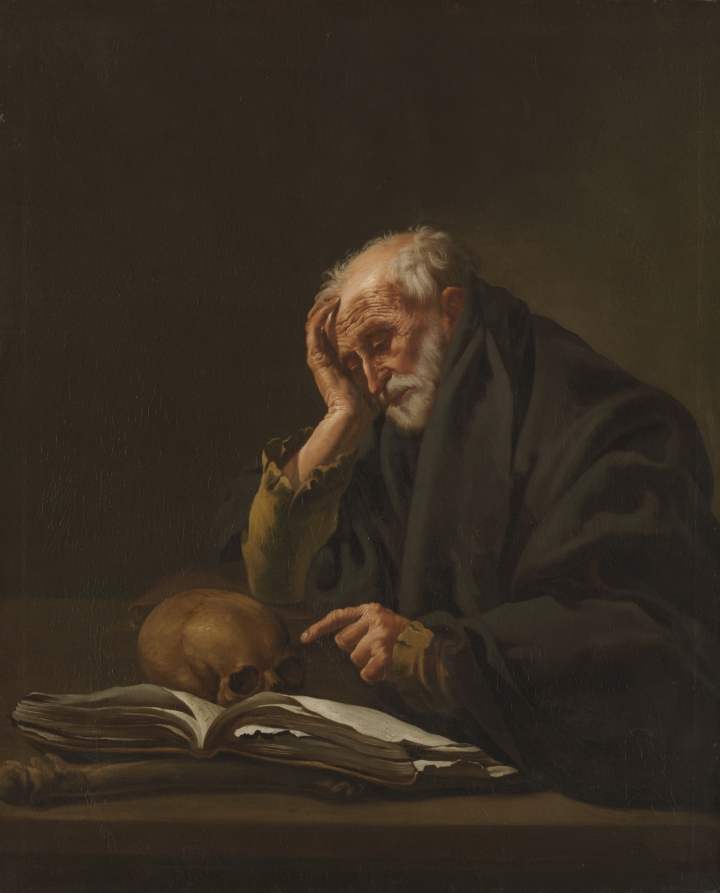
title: Saint Jerome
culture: Flanders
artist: Hendrick ter Brugghen (Dutch, 1588–1629)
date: c. 1621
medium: oil on canvas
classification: Painting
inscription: Signed and dated upside down on open book: "H TBrugghen 1621"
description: Not all subjects are easy to identify. This museum long thought that the subject was the Greek philosopher Heraclitus, largely because tears are part of the standard representation of this ancient thinker. However, ter Brugghen omits the other crucial key to identifying Heraclitus--a globe over which he weeps. Instead, the book and skull indicate that the figure is Saint Jerome, known for translating the Bible into Latin. The artist probably chose to show Jerome crying to intensify his penitence.